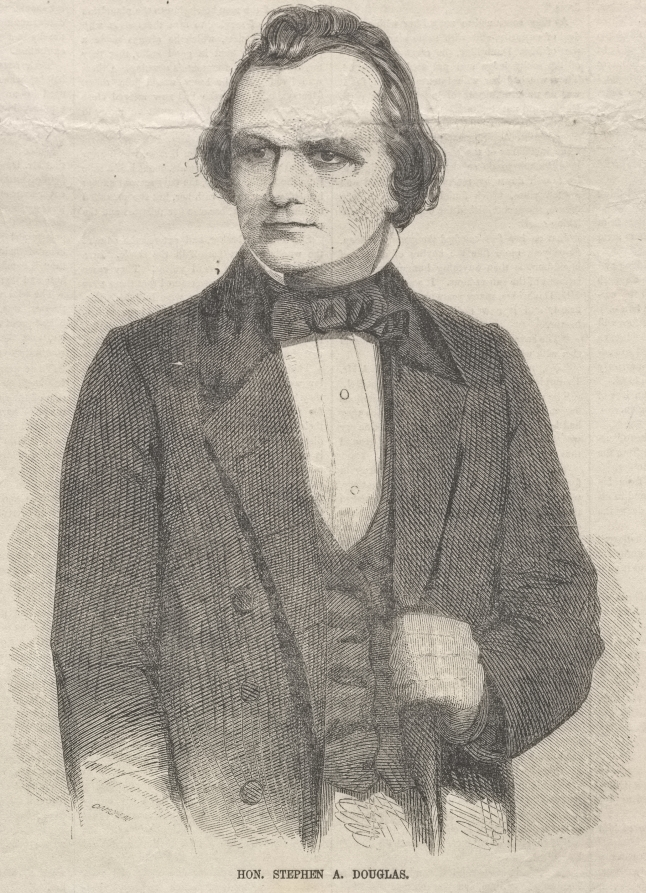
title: Hon. Stephen A. Douglas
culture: America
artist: Winslow Homer (American, 1836–1910)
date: 1859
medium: wood engraving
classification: Print